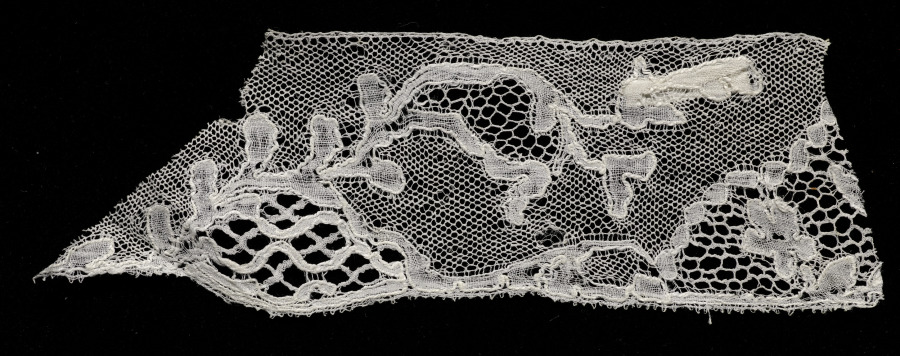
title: Lace Fragment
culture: Spain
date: 1700s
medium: Silk: bobbin lace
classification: Lace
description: This technique used for this lace fragment is a type found in Belgium and known as Mechelen lace.